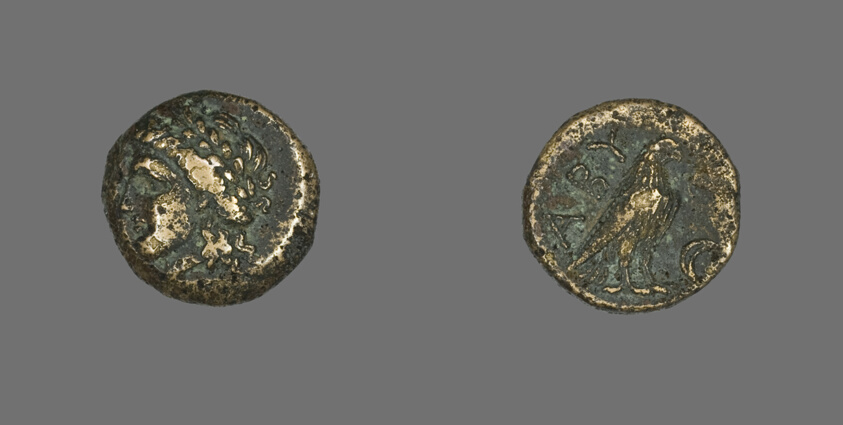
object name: Coin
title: Coin Depicting the God Apollo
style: greek, ancient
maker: Greek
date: 320-200 BCE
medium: Bronze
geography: Ancient Greece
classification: coin; ancient art